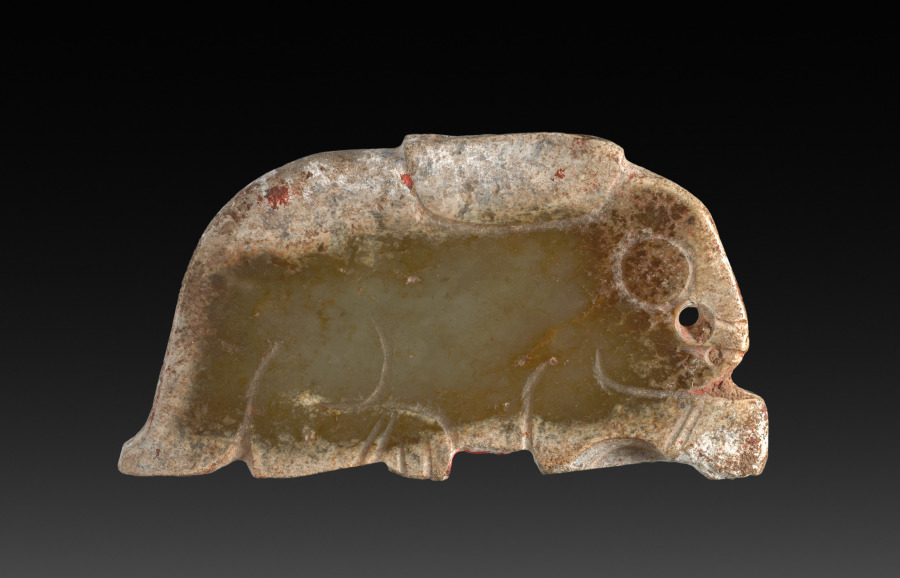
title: Hare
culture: China, Shang dynasty (c. 1600–c. 1046 BCE) to Western Zhou dynasty (c. 1046–771 BCE)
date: 1100s–800 BCE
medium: jade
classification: Jade